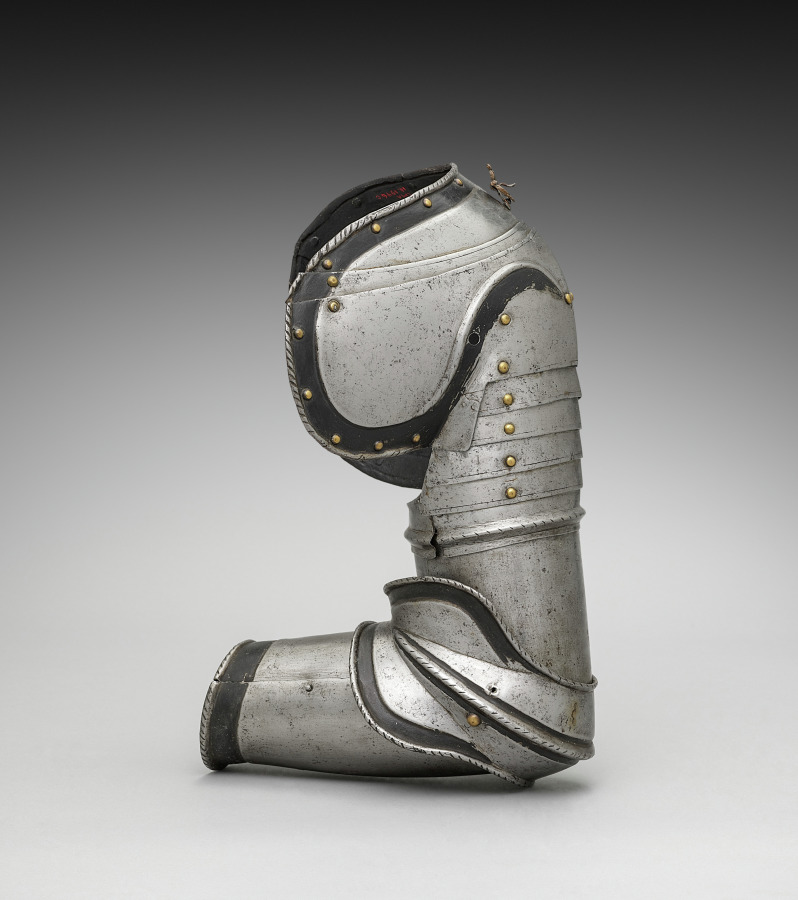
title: Left Pauldron with Rerebrace (upper cannon) and Lower Cannon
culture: Germany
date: c.1550–1570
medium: iron, steel, leather and brass rivets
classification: Arms and Armor